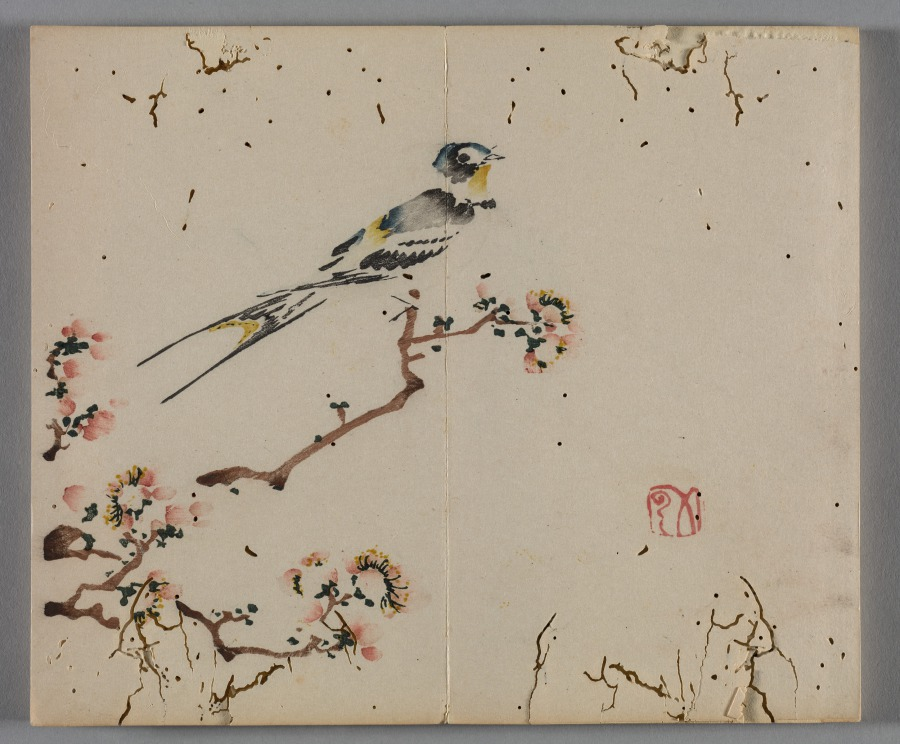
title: Ten Bamboo Studio Painting and Calligraphy Handbook (Shizhuzhai shuhua pu): Birds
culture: China, Qing dynasty (1644-1911)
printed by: Hu Zhengyan (Chinese, c. 1584–1674)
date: 1633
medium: Woodblock-printed book; ink and colors on paper; first edition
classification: Print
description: Color printing reached a level of perfection in the early 1600s, as seen in this Ten Bamboo Studio Collection of Calligraphy and Painting and the Mustard Seed Garden Manual of Painting (printed 1679 and 1701). The painterly quality, precision in registering (aligning) the woodblocks, and harmonious colors made them the most successful color print editions in Chinese history. Both editions were printed and compiled in Nanjing, spread nationwide, and had a great impact on the arts in Japan and Korea.